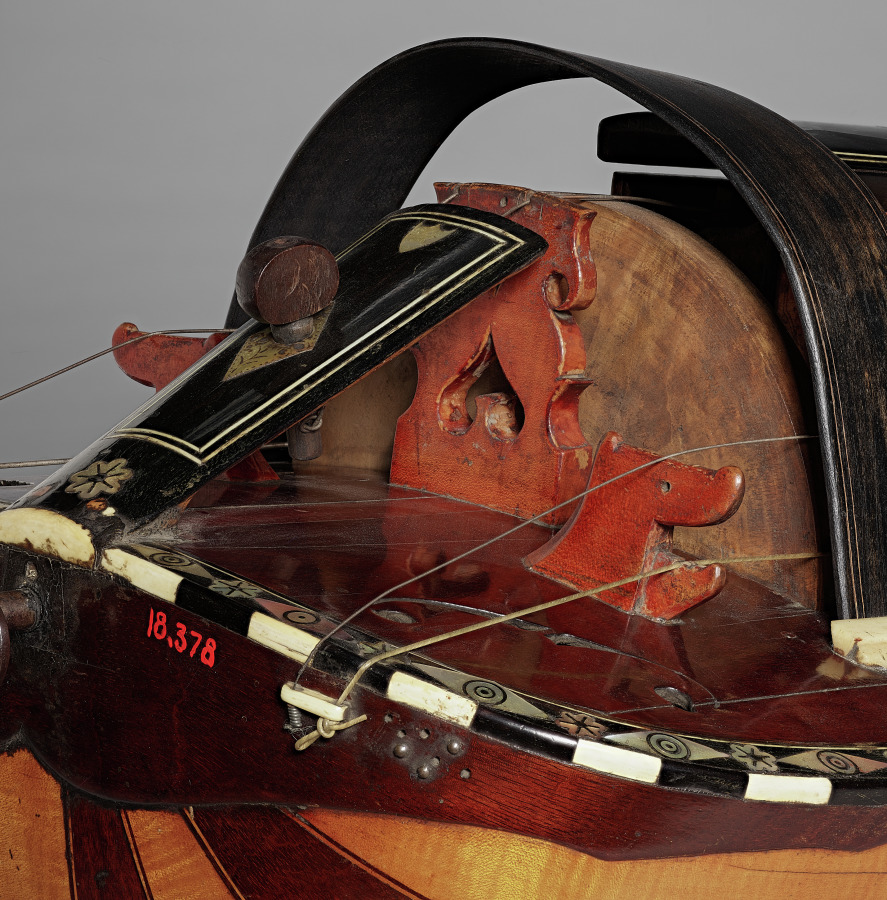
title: Vielle à roue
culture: France, 18th century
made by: Pajot of Jánzat (French)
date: 1700s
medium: wood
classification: Musical Instrument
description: The instrumentalist could play melodies on the keyboard that presses tangents against one or more strings. Often there are also multiple drone strings, which give a constant pitch accompaniment to the melody, resulting in a sound similar to that of bagpipes. This type of instrument is depicted in several artworks in the CMA collection: 1924.656, 2008.34.2, 1960.20. The vielle à roue is also related to the Swedish nyckelharpa, which was featured on the CMA performing arts series in 2017 played by Emilia Amper.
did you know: Also known as a “hurdy-gurdy” or “wheel fiddle,” this instrument produces sound by a hand crank-turned rosined wheel rubbing against the strings.